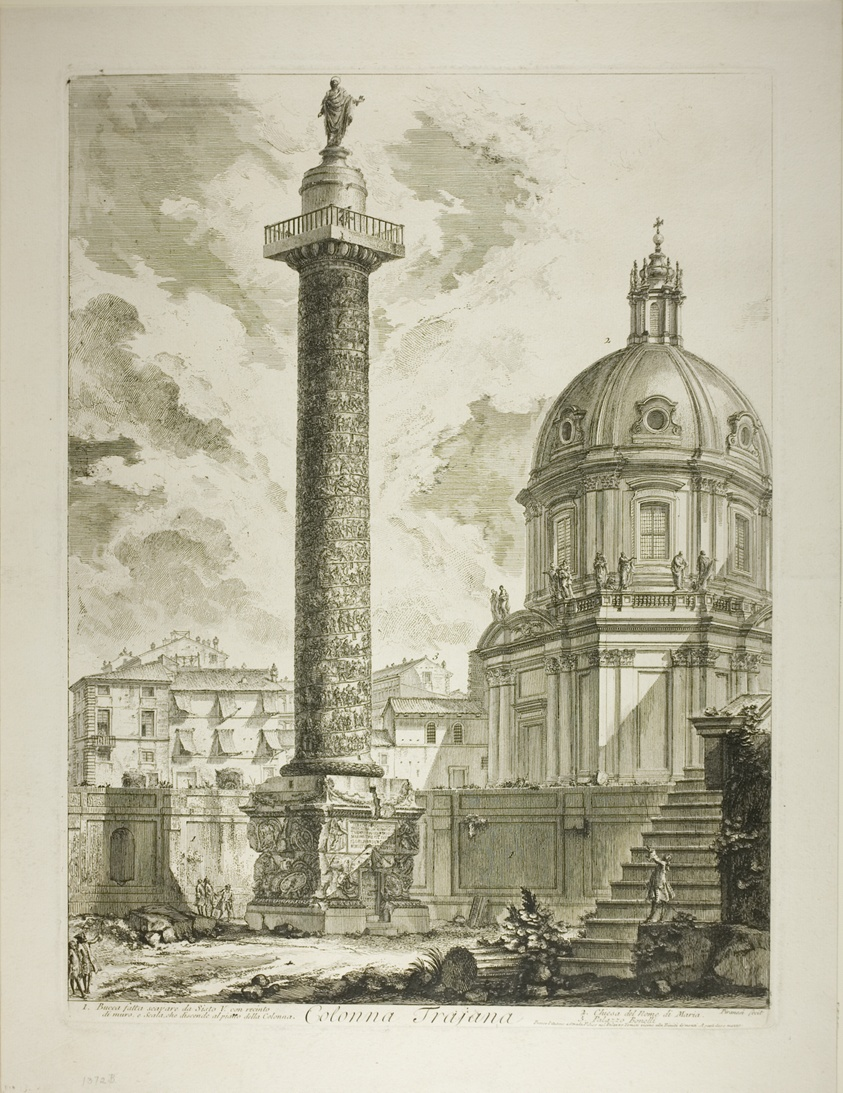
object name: Print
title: Trajan's Column, from Views of Rome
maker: Giovanni Battista Piranesi (Italian, 1720-1778)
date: 1750/59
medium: Etching on heavy ivory laid paper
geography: Italy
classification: etching; print; prints and drawing